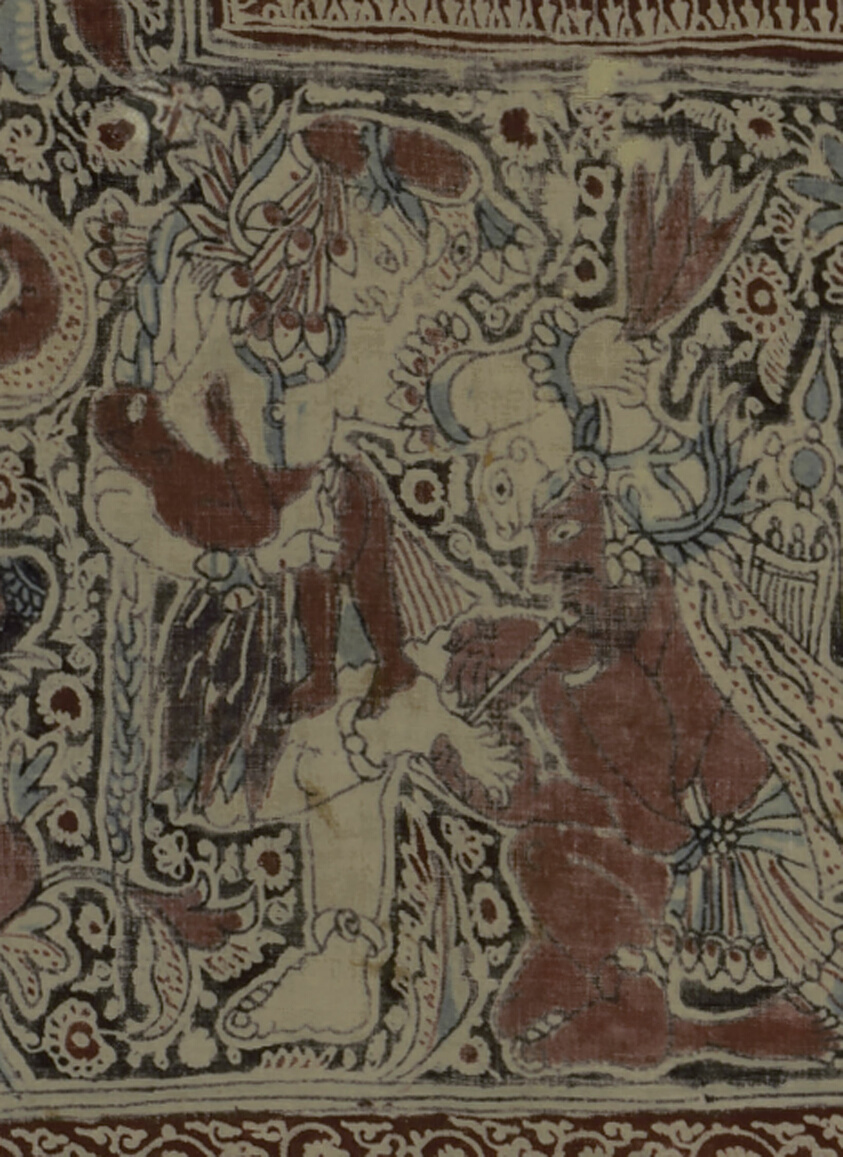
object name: Textile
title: Painted cotton with medallion and figures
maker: Deccan, India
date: 15th century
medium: cotton, plain weave; painted mordant; resist-dyed; painted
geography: India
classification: textile; weaving - printed